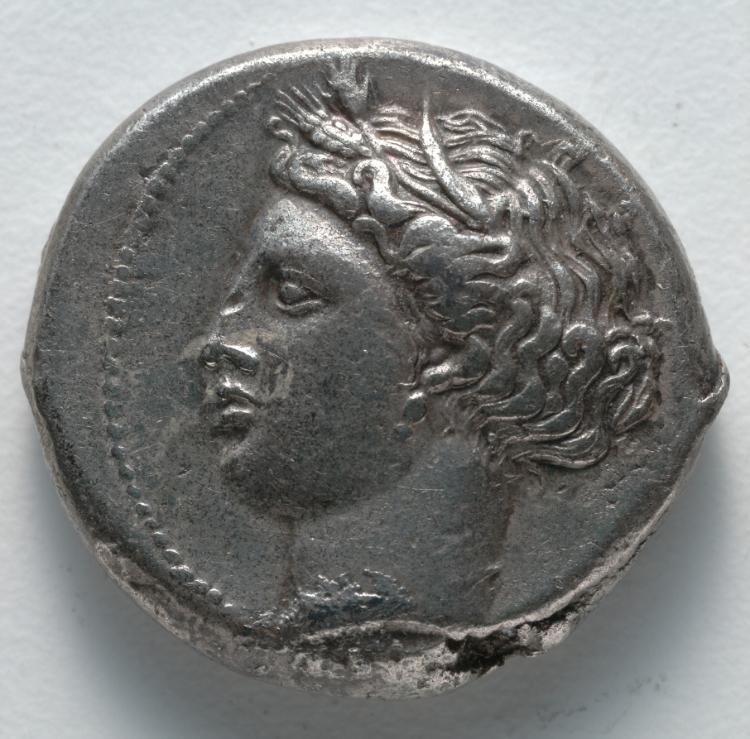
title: Tetradrachm: Head of Tanit-Persephone (obverse)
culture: Greek, Siculo-Punic, probably minted at Lilybaion (Sicily)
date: c. 350–320 BCE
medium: silver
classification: Coins